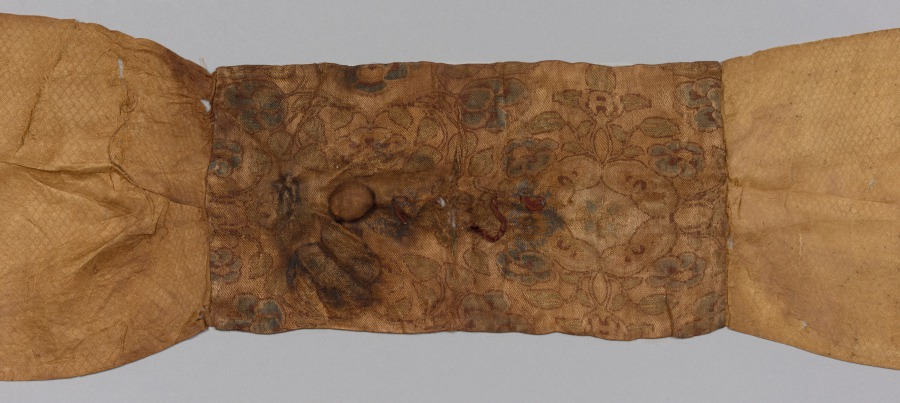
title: Silk Belt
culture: China, Liao dynasty (907-1125)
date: 907–1125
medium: compound twill weave, silk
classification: Textile